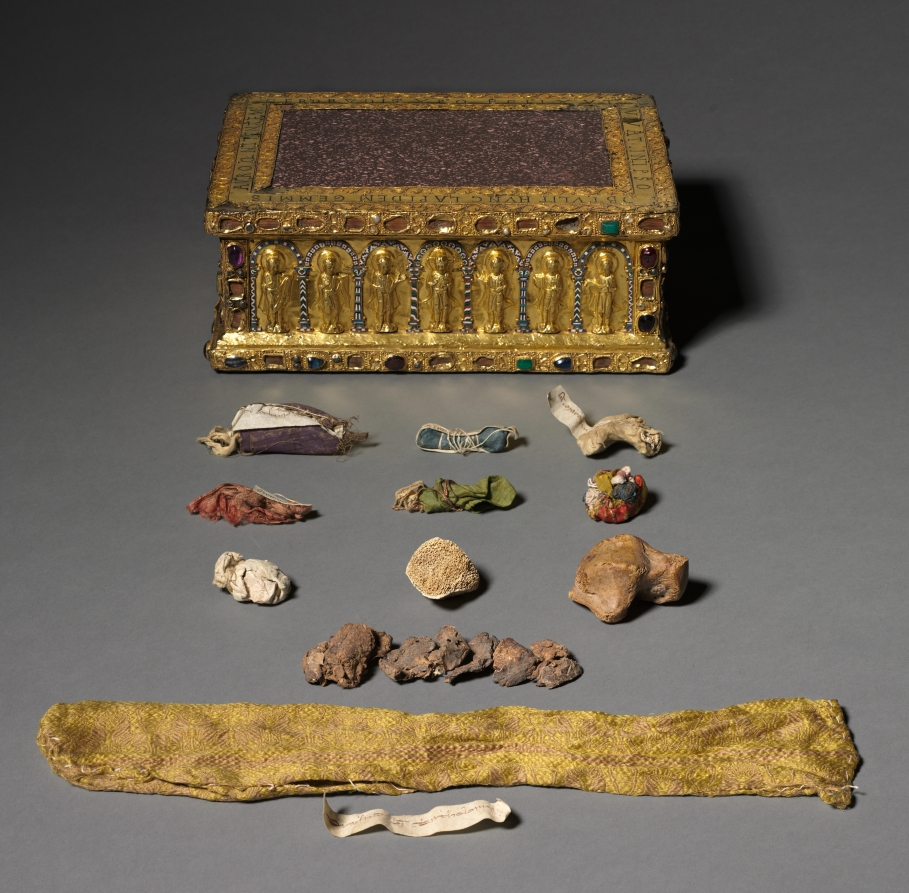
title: Portable Altar of Countess Gertrude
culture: Germany, Lower Saxony?, Romanesque period, 11th century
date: c. 1045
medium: gold, cloisonné enamel, porphyry, gems, pearls, niello, wood core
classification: Metalwork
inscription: GERDRVDIS XPO FELIX VT | VIVAT IN IPSO OBTVLIT HVNC LAPIDEM GEMMIS | AVROQ NITENTEM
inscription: SIGISMVNDVS, CONSTANTIVS, SANCTA CRVX, SCA ELENA, SCA ADALHEIT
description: Commissioned by Countess Gertrude of Brunswick, this portable altar is one of the Guelph Treasure’s earliest and most sumptuous objects. The choice of white-speckled porphyry as the altar stone signals Gertrude’s worldly aspirations; an imperial color since classical antiquity, porphyry was only used by the imperial family. Historical figures of royal and imperial rank are depicted with Christ, the Virgin, apostles, and archangels along the altar’s sides, stressing the countess’s political ambitions and claim of imperial lineage for her own dynasty. The Latin inscription surrounding the altar stone reads, "Gertrude offers to Christ, to live joyfully in him, this stone that glistens with gems and gold."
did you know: On the bottom of this altar is a trap door that opened to reveal small relics of saints wrapped in silk.